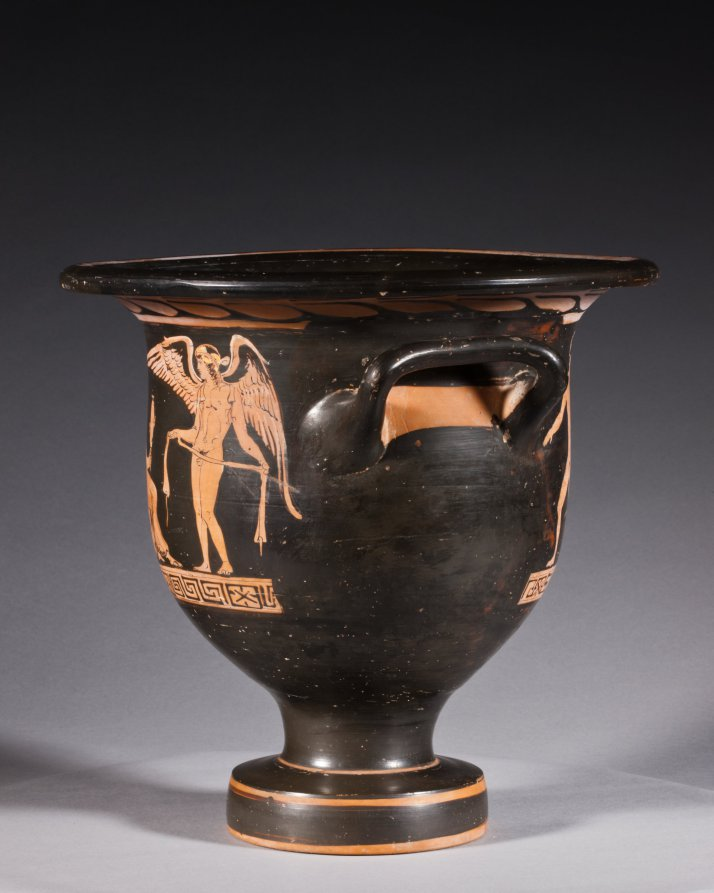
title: Red-Figure Bell Krater (Mixing Vessel): Aphrodite and Eros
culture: South Italian, Apulian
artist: attributed to Graz Painter (South Italian, Apulian, active c. 380–360 BCE)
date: c. 370–360 BCE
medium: ceramic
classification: Ceramic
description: This small mixing vessel shows a finely dressed woman seated on a chest and holding up a mirror to admire herself. Before her stands Eros, the winged god of love, holding a ribbon or sash. Behind the woman stands a pillar with the inscription ΑΦΡΟΔΙΤΗ, or APHRODITE, the goddess of love. Such labels are rare on vases, and scholars debate whether this names the woman shown as Aphrodite herself, with her son Eros, or a bride envisioning herself as Aphrodite, just before her wedding.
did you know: The dancing nude youths on the reverse are unusual; typically they would be standing and draped.